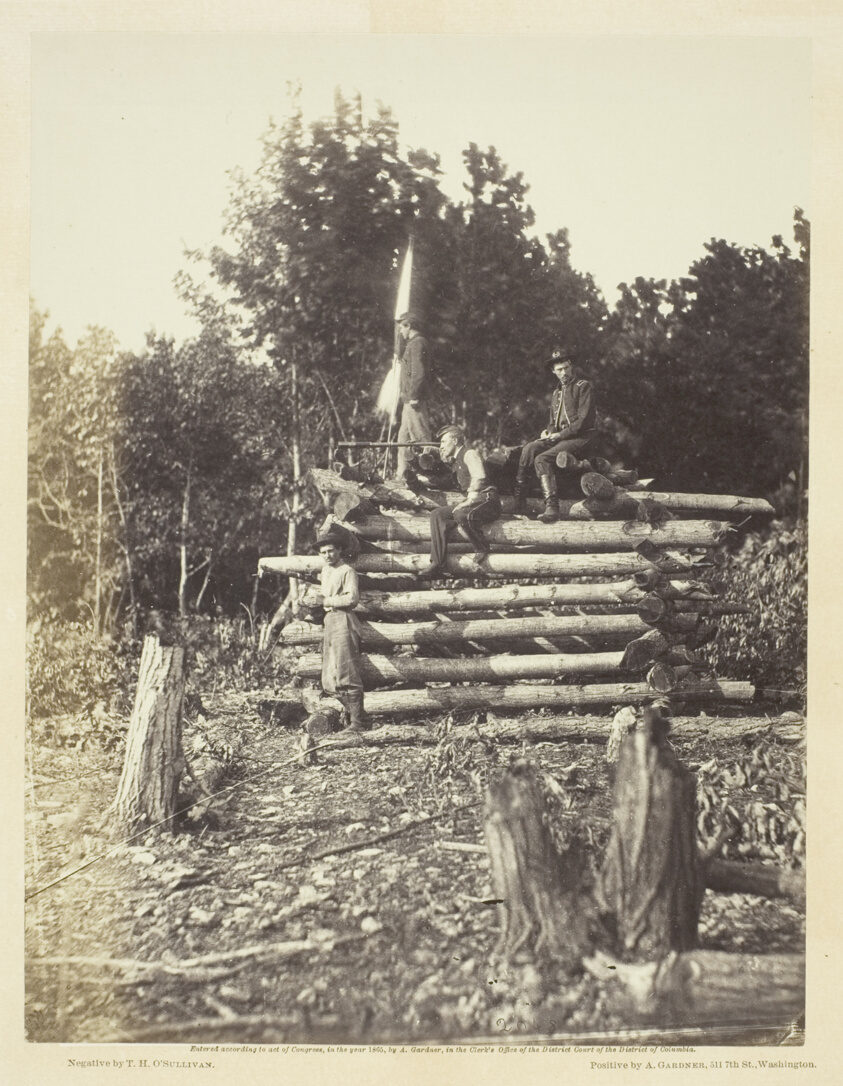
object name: Photograph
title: Signal Tower on Elk Mountain, Maryland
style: 19th century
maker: Timothy O'Sullivan (American, born Ireland, 1840–1882)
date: September 1862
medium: Albumen print, pl. 22 from the album "Gardner's Photographic Sketch Book of the War, vol. 1" (1866)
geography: United States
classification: photograph; albumen silver print; photography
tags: Collected by Hugh Edwards, Gardner's Photographic Sketch Book